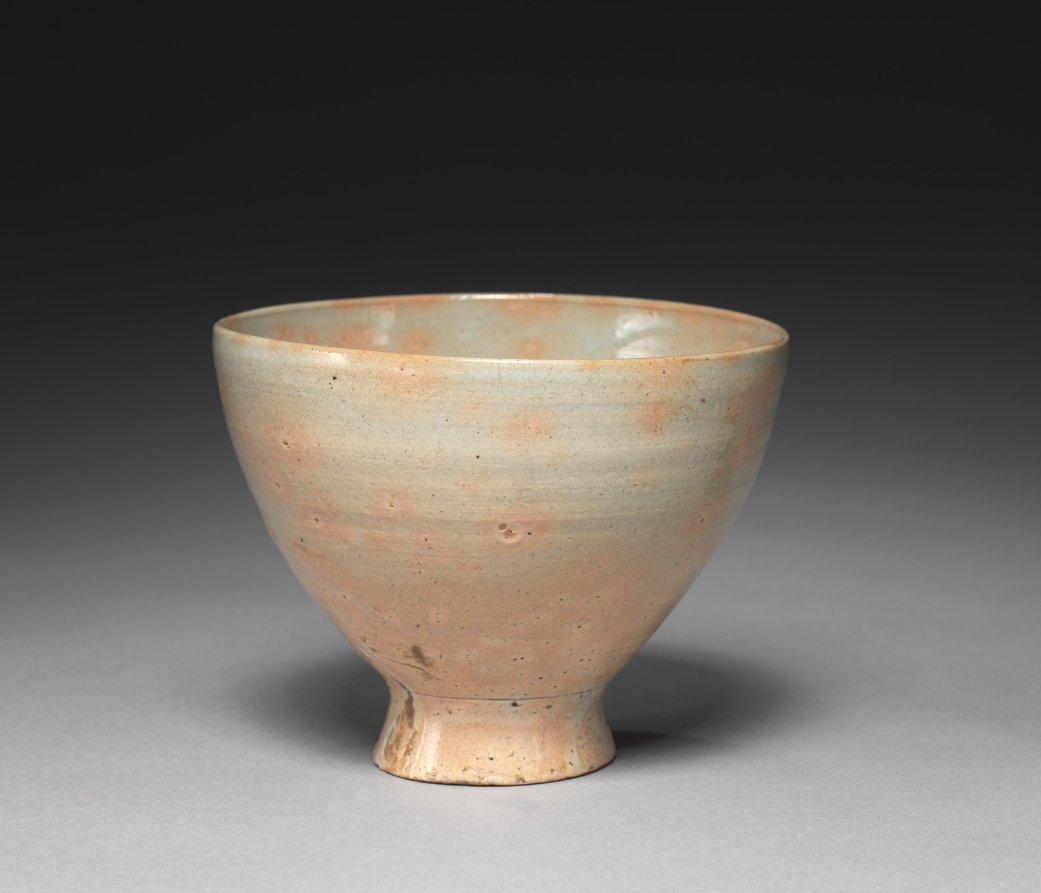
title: Tea bowl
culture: Korea, Joseon dynasty (1392–1910)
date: 1700s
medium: glazed stoneware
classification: Ceramic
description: Possibly produced in one of the kilns established by the trading office (Waegwan) in Busan, southern Gyeongsang province, this type of bowl with an elongated foot was exported to Japan and circulated as an item of foreign luxury among Japanese tea ware collectors. Pinholes in the light pinkish glaze were intended to resemble "fawn spots."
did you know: Pinholes in the light pinkish glaze were intended to resemble "fawn spots."